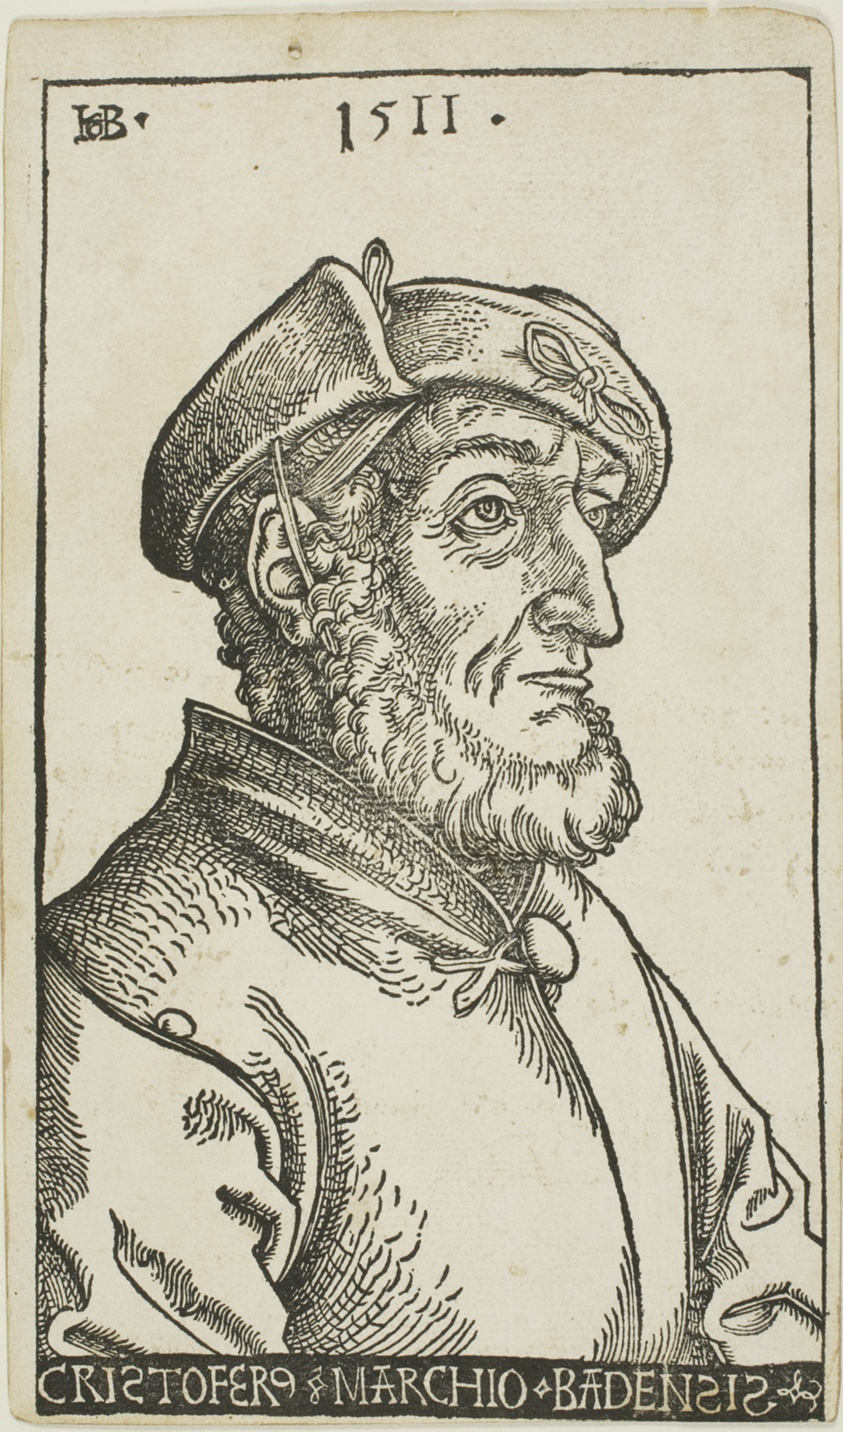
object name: Print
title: Margrave Christoph I of Baden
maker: Hans Baldung Grien (German, 1484/85-1545)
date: 1511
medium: Woodcut in black on cream laid paper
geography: Germany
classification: woodcut; print; prints and drawing